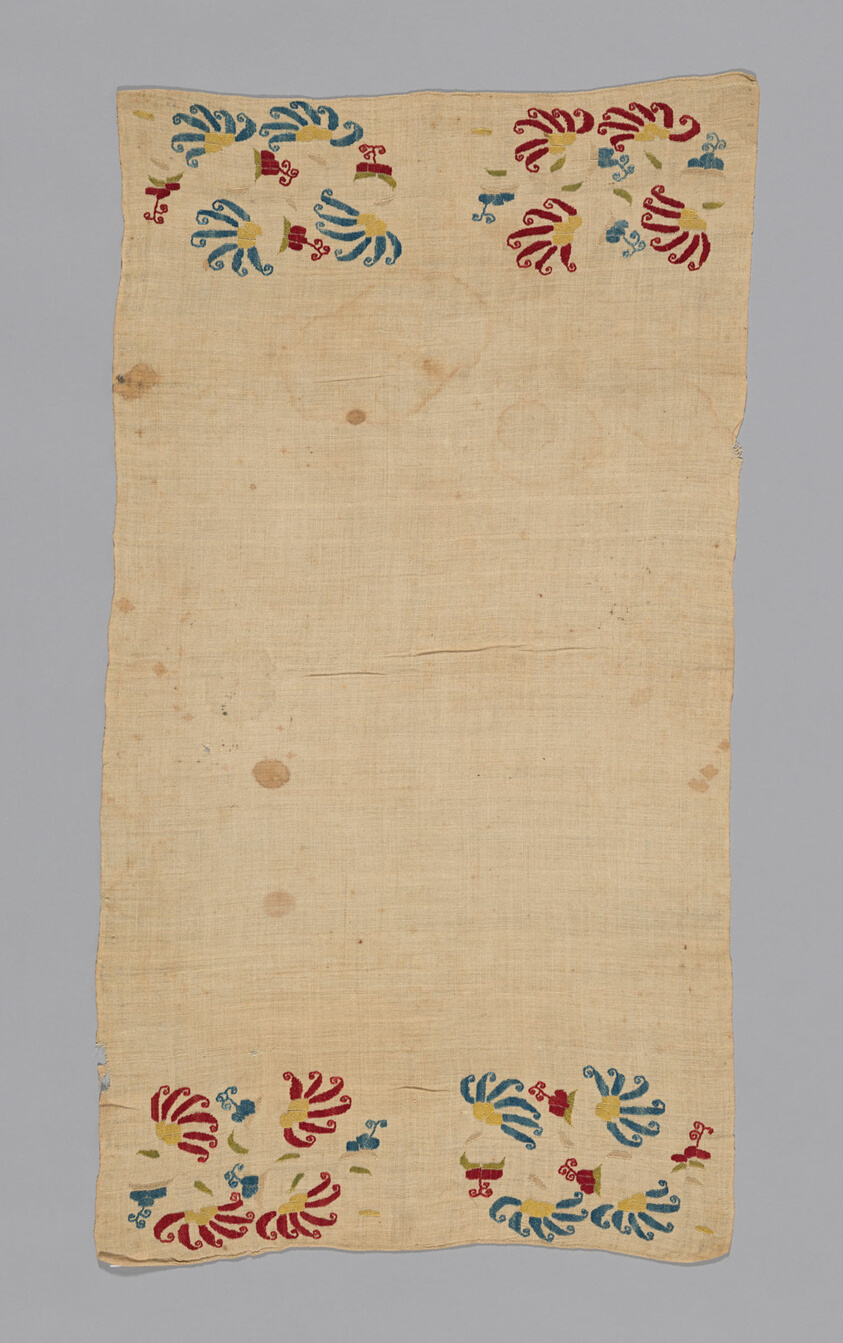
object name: Textile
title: Towel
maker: Turkey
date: 17th/early 18th century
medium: Towel embroidered in flower design.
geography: Turkey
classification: textile; needlework (visual works); weaving